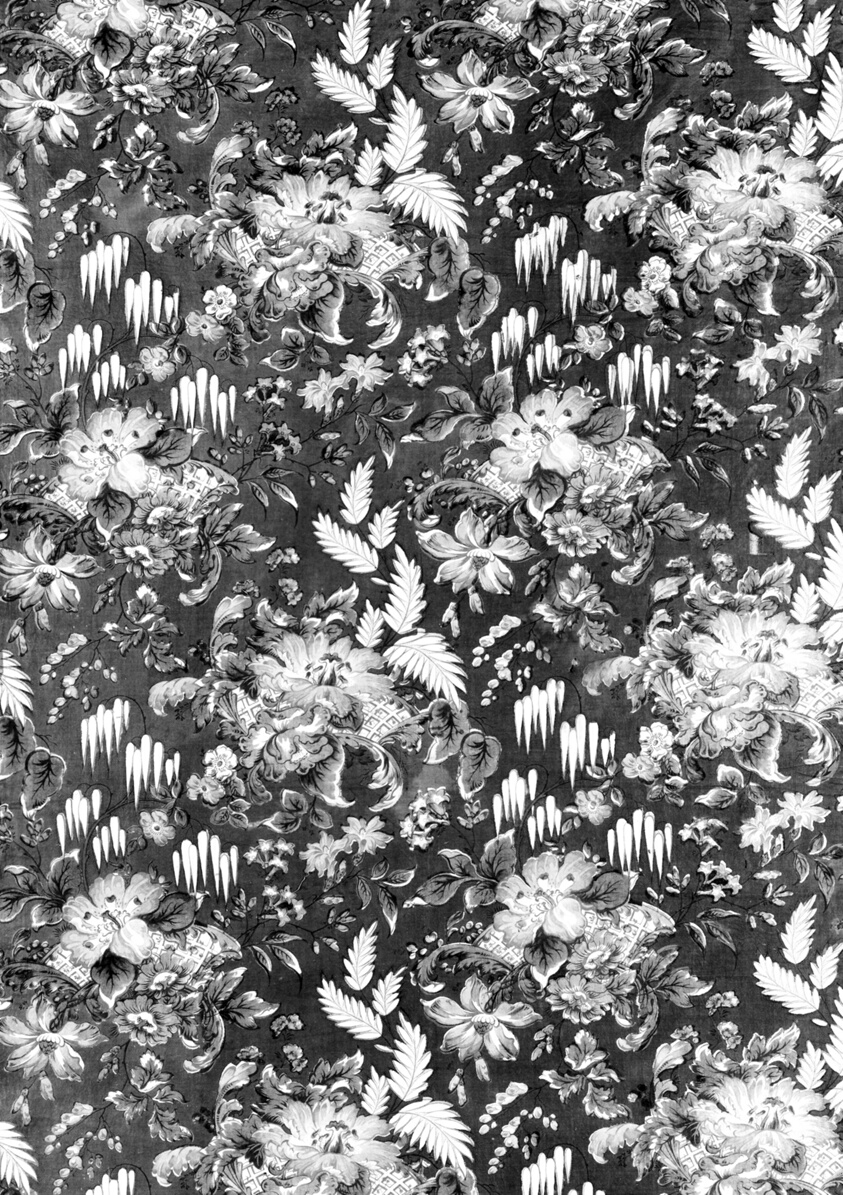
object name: Textile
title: Panel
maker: England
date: 1845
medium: Cotton, plain weave; roller printed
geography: England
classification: textile; weaving - printed